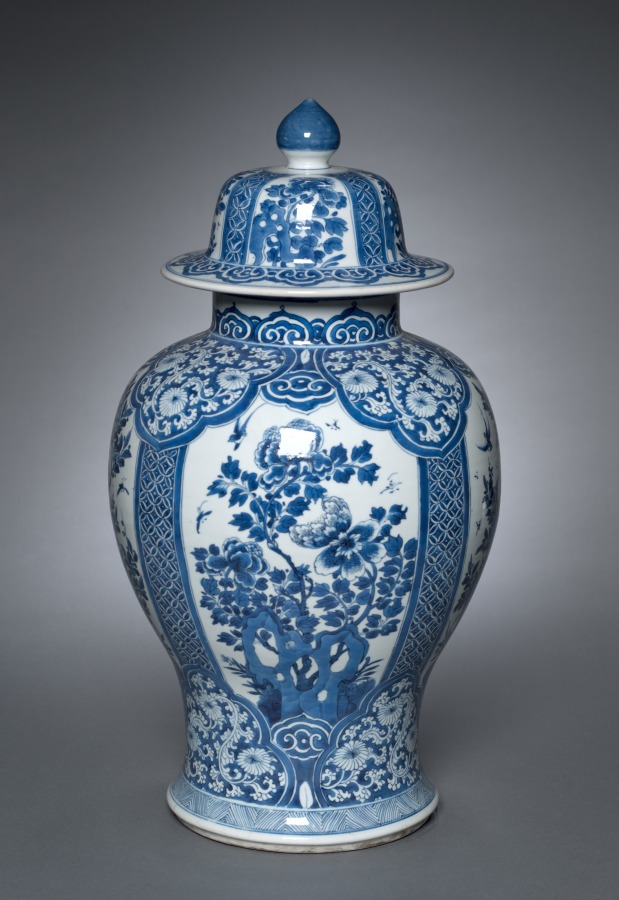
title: Vase with Cover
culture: China, Jiangxi province, Jingdezhen kilns, Qing dynasty (1644–1911), Kangxi reign (1662–1722)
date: 1662–1722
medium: porcelain with underglaze blue decoration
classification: Ceramic